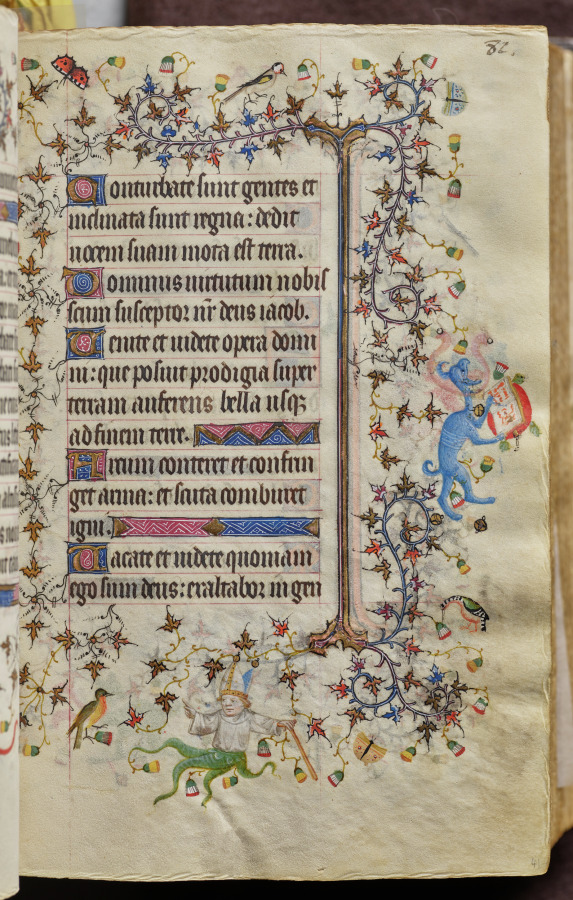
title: Hours of Charles the Noble, King of Navarre (1361-1425): fol. 41r, Text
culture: France, Paris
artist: Master of the Brussels Initials and Associates (French)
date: c. 1405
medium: ink, tempera, and gold on vellum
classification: Bound Volume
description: This precious book was highly prized by its owner, Charles III, King of Navarre, a French-born prince whose coat of arms is painted on 20 folios. Charles visited Paris on numerous occasions and likely acquired this volume there in 1404. Paris was the center of the European book trade at the time and attracted illuminators from many parts of Europe. This manuscript represents one of the most remarkable fusions of French and Italian taste in book illumination. Though conforming to Parisian standards, most of the book’s major miniatures are the work of the Brussels Initials Master, an Italian illuminator who previously worked in Bologna and Padua.